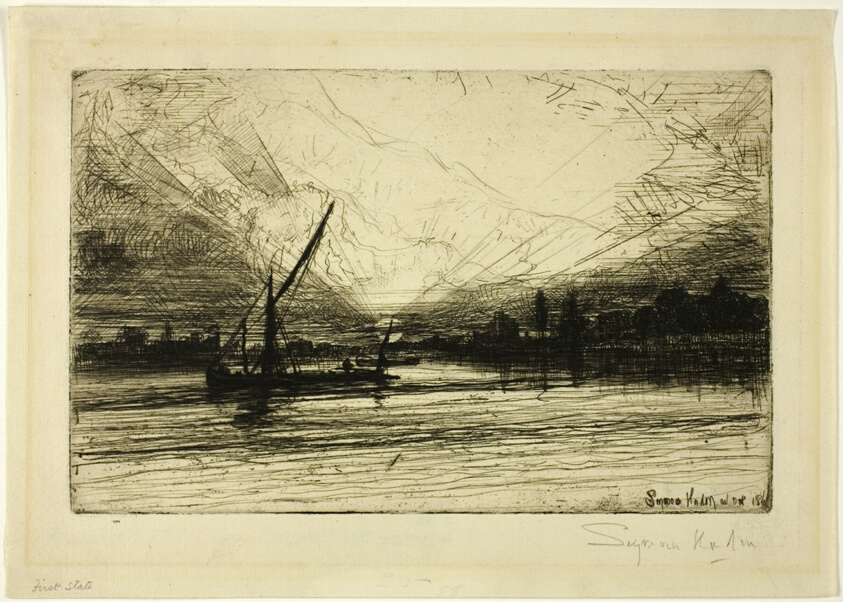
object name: Print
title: Sunset on the Thames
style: 21st Century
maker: Francis Seymour Haden (English, 1818-1910)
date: c. 1865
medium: Etching and drypoint on ivory wove paper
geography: England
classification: etching; print; prints and drawing